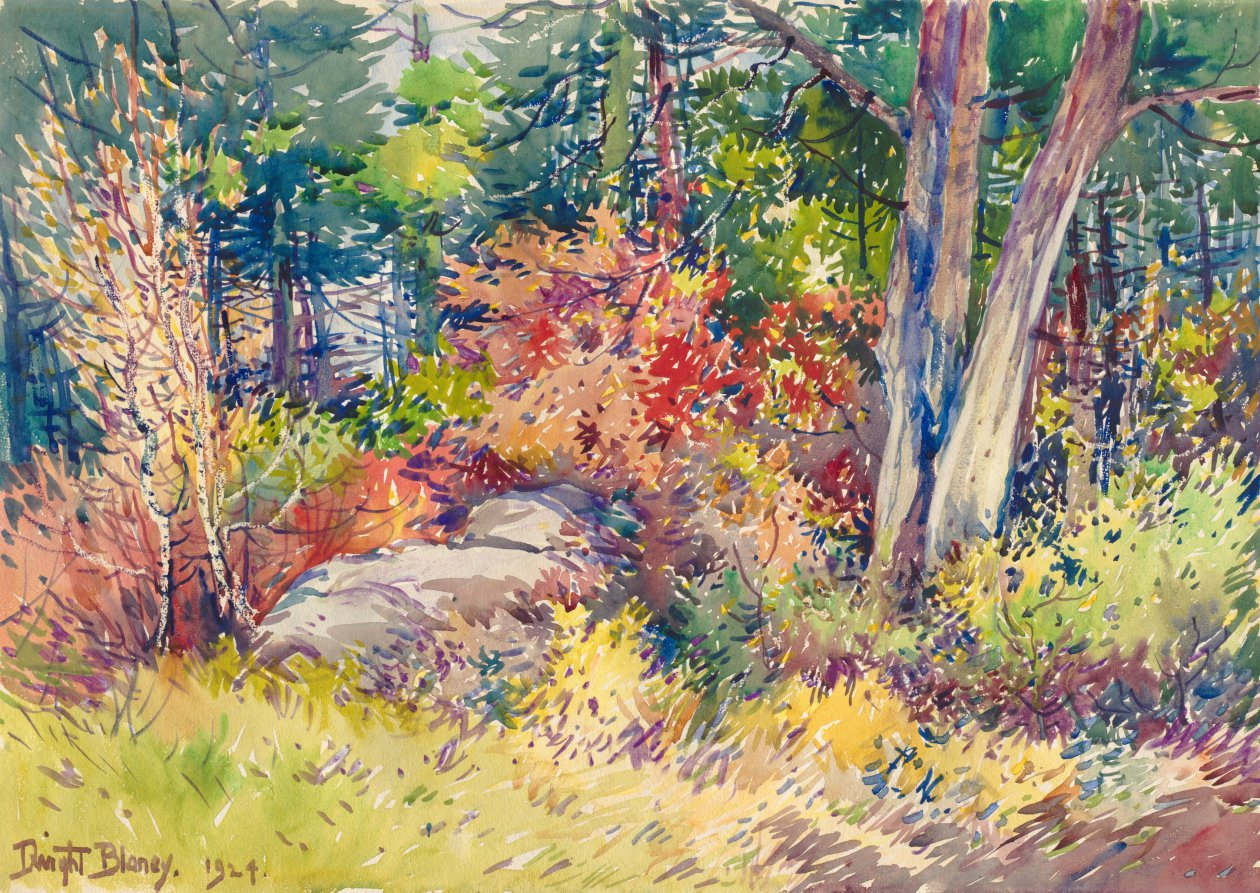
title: Autumn Forest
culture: America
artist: Dwight Blaney (American, 1865–1944)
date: 1924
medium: watercolor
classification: Drawing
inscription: Signed lower left: "Dwight Blaney, 1924"